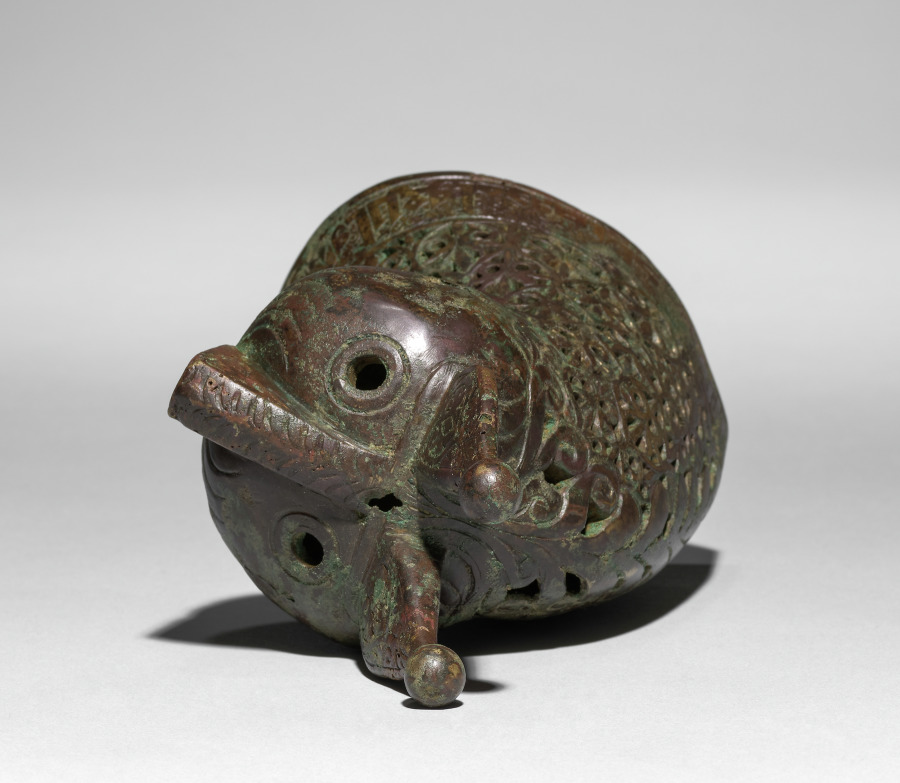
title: Head for a Feline Incense Burner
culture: Iran, Khurasan, Seljuq period of Iran (1037–1194)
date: 1150–1200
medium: Copper alloy, cast, engraved, chased, and pierced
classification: Metalwork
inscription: Qur'an sura al-jum'ah (The Friday Congregation) 62:9-10 (on neck and spine)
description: In Iran during the 1000s and 1100s, vessels in the shape of animals gained popularity, especially as incense burners. Felines were favored in Persian art and this piece may represent a caracal, a type of lynx. The head of the creature was cast separately and is removable to fill its body with hot coals and incense. Qur’anic verses on the neck and spine remind worshippers to set work aside, attend prayer, and then disperse to seek God’s bounty. The diffusion of perfumed smoke through the burner’s pierced palmette design may have served as a sensorial reminder of this teaching.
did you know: The head and body were each cast in halves that were soldered or welded together.